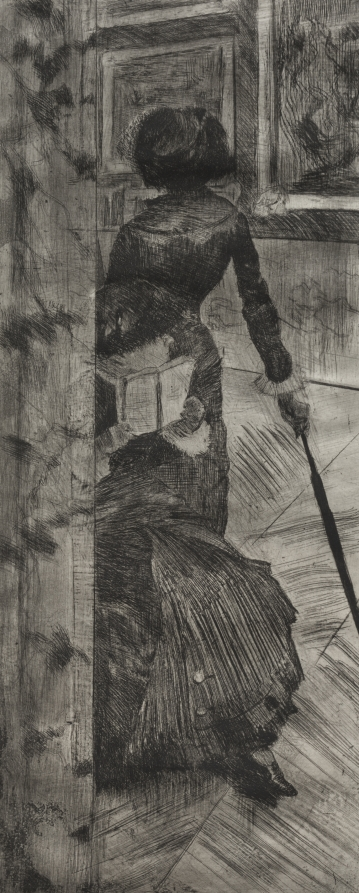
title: Mary Cassatt at the Louvre: The Paintings Gallery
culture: France, 19th century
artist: Edgar Degas (French, 1834–1917)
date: 1879–80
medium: etching, softground etching, aquatint, and drypoint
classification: Print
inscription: Watermark: FRERES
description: Degas and his friends Mary Cassatt and Camille Pissarro were all experimental printmakers who combined traditional printmaking techniques to create a black and white equivalent for the tonality and varied textures of paintings. They were all so involved in printmaking that in 1879–80 they planned to publish a journal, Le Jour et la nuit (Day and Night), that would contain original etchings. As a printmaker, Degas was ambivalent about when a plate was considered finished. What attracted him to printmaking was the variability. He thoroughly enjoyed reworking, retouching, and transforming plates, often progressing toward more subtle painterly effects.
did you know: The figure seated in the foreground is believed to be Mary Cassatt's sister, Lydia.